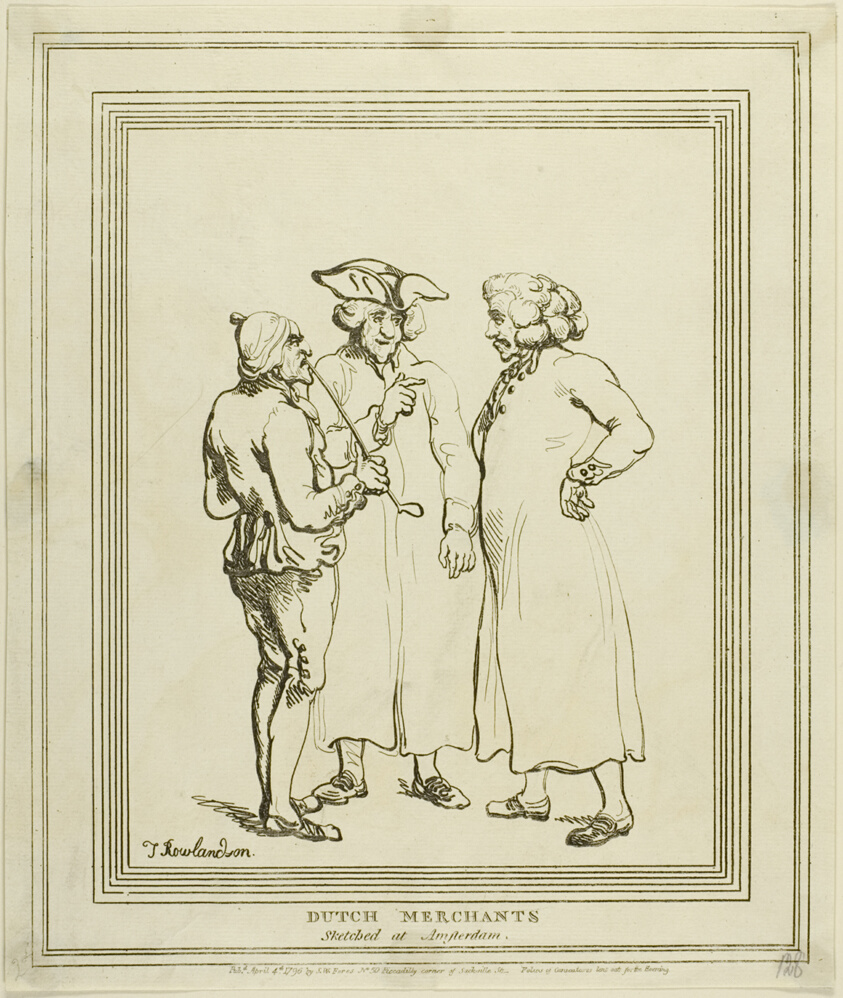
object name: Print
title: Dutch Merchants Sketched at Amsterdam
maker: Thomas Rowlandson (English, 1756-1827); published by S.W. Fores (English, 1761-1838)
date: published April 4, 1796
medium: Hand-colored etching on ivory wove paper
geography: England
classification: etching; print; prints and drawing